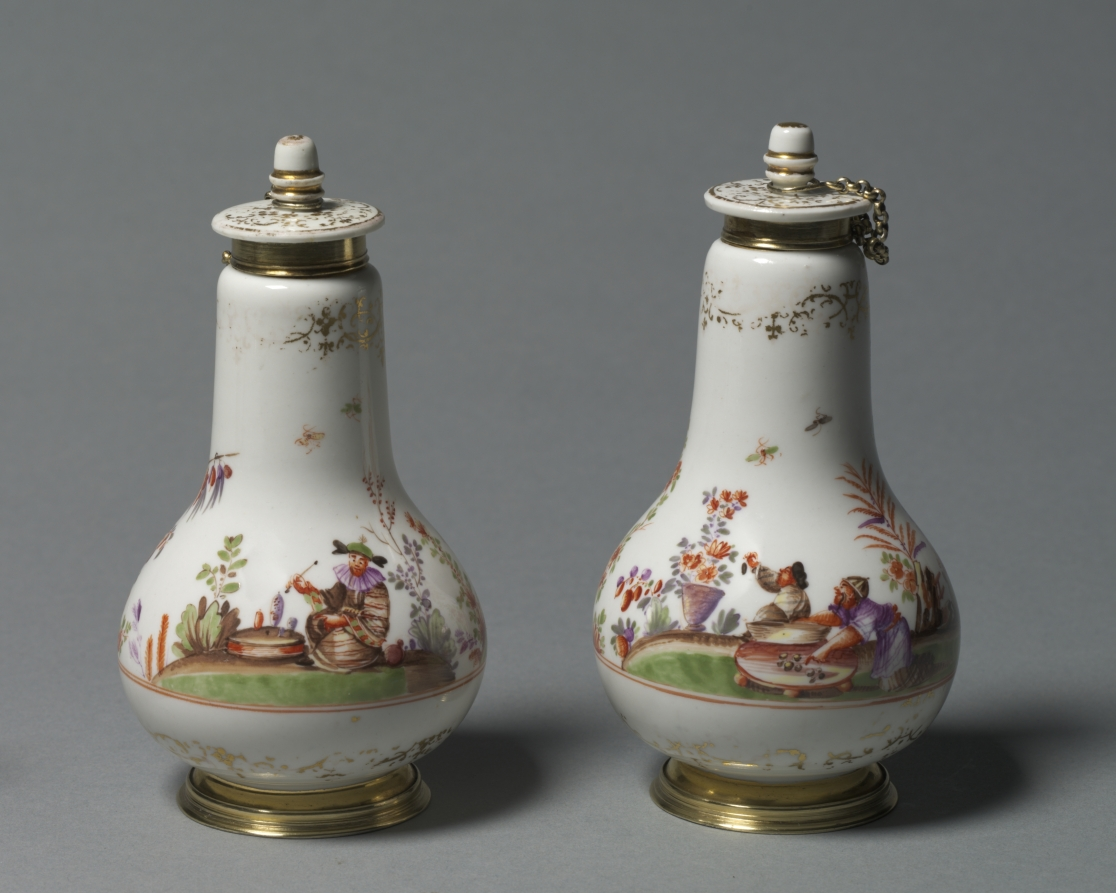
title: Covered Flasks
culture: Germany, Meissen, 18th century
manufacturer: Meissen Porcelain Factory (German, est. c. 1710)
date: c. 1720–1723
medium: porcelain with gilt metal mounts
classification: Ceramic